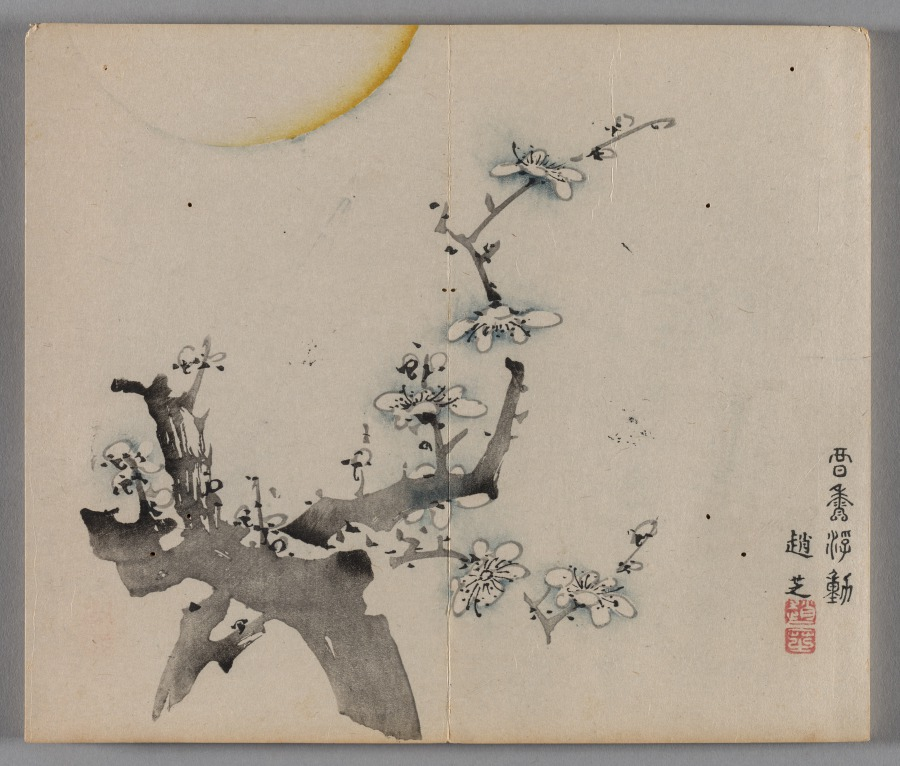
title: Ten Bamboo Studio Painting and Calligraphy Handbook (Shizhuzhai shuhua pu): Plum Blossoms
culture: China, Qing dynasty (1644-1911)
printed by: Hu Zhengyan (Chinese, c. 1584–1674)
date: 1633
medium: Woodblock-printed book; ink and colors on paper; first edition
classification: Print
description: Color printing reached a level of perfection in the early 1600s, as seen in this Ten Bamboo Studio Collection of Calligraphy and Painting and the Mustard Seed Garden Manual of Painting (printed 1679 and 1701). The painterly quality, precision in registering (aligning) the woodblocks, and harmonious colors made them the most successful color print editions in Chinese history. Both editions were printed and compiled in Nanjing, spread nationwide, and had a great impact on the arts in Japan and Korea.